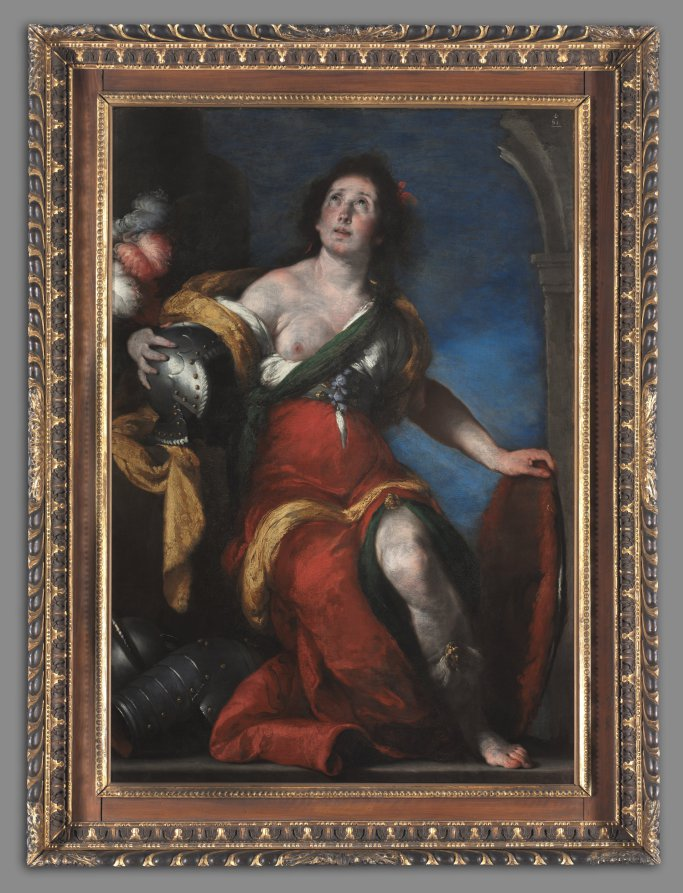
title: Allegorical Figure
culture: Italy, 17th century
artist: Bernardo Strozzi (Italian, 1581?-1644)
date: c. 1636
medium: oil on canvas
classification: Painting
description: During the 1630s, the Genoese artist Bernardo Strozzi painted a number of female figures representing various intellectual and artistic pursuits, reflecting the appeal of such allegories among learned patrons in northern Italy. Recent scholarship has convincingly identified the subject of this painting as Minerva. The Roman goddess of war has put aside her armor for more contemplative pursuits; her upward gaze—as if seeking inspiration—recalls her other associations with wisdom, eloquence, and the arts.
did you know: The preparatory drawing for this painting is also in the collection of the Cleveland Museum of Art (1953.626).